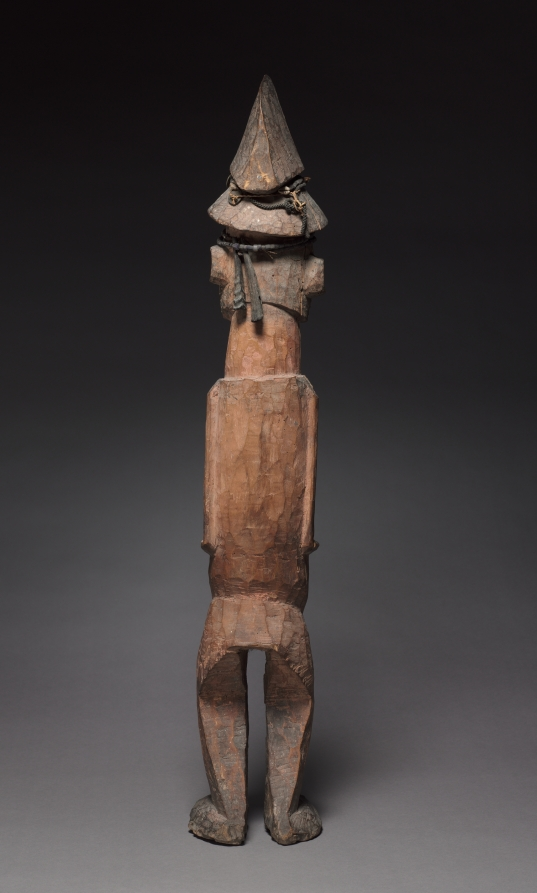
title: Male Figure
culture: Africa, Central Africa, Republic of the Congo (most likely) or Democratic Republic of the Congo, Teke-style maker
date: late 1800s-early 1900s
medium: Wood, resin, iron, copper, plant fiber, cloth, glass beads, coins, antelope horns, and cowrie shells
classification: Sculpture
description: This exceptionally large Teke figure is well preserved and holds a medicine package partly buried in an abdominal cavity. Its size suggests that it stood at the service of a larger group of people and that its powers extended beyond the limits of a village. Its scarification marks and beard identify it as representing a chief or another dignitary.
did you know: The coins on the figure’s hat were those used in the Belgian Congo.